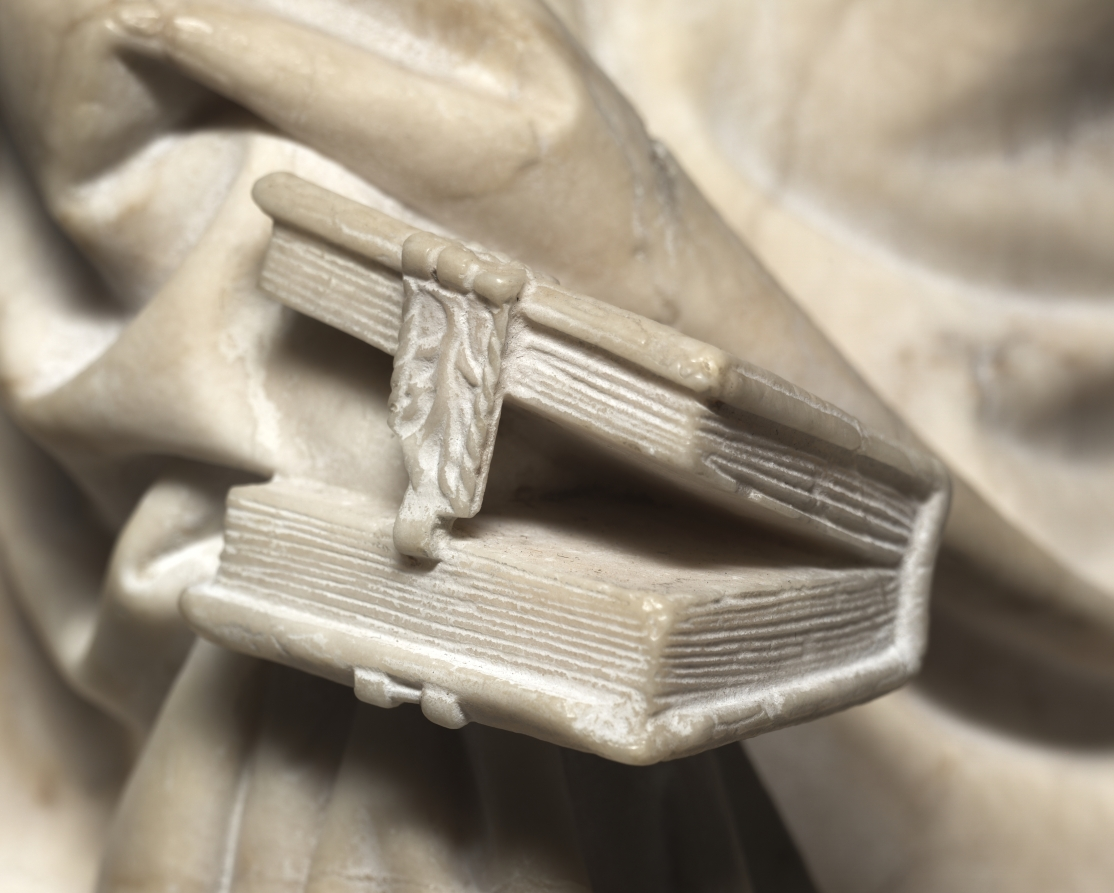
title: Mourner from the Tomb of John the Fearless and Margaret of Bavaria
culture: Spanish, Burgundy, Dijon, 15th century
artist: Jean de la Huerta (Spanish, active Burgundy, 1431–62)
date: 1443–45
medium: salins alabaster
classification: Sculpture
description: This monklike figure has a variously textured monochrome surface. Alabaster’s softness made it easy to carve details like the fabric and fur of the mourner’s robe and the codex pages in his hand. This is one of 40 mourners from an elaborate funeral procession beneath an intricately carved alabaster arcade. This mourner comes from the monastery of Champmol near Dijon, which became a primary burial place for Burgundian dukes. The sculpture was part of the tomb of John the Fearless (1371–1419), commissioned by his son Philip the Good (1396–1467), modeled after the earlier monument for Philip the Bold.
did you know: A plaster cast of this mourner adorns the Tomb of John the Fearless and Margaret of Bavaria in Dijon, France.